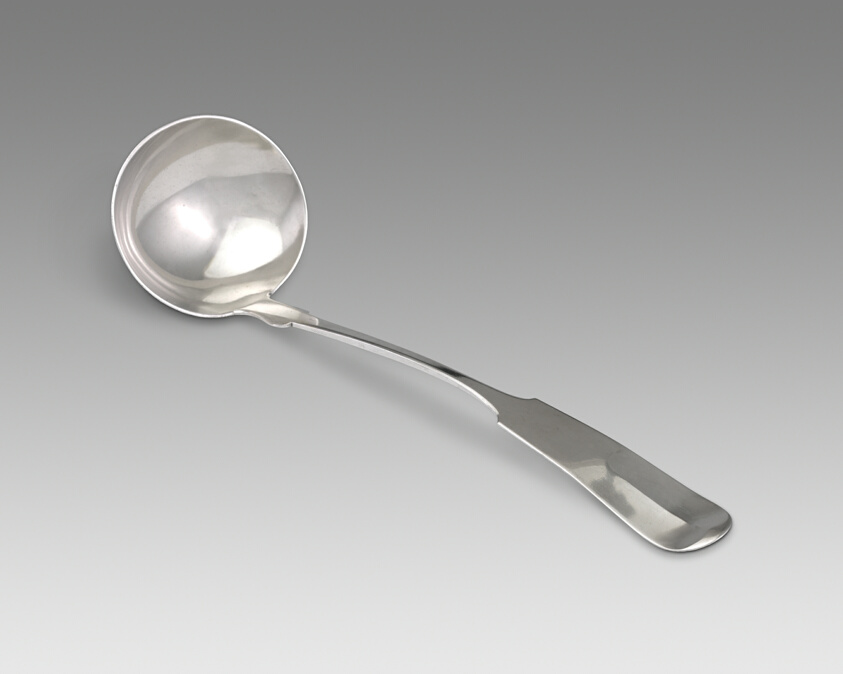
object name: Metalwork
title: Ladle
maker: James Easton; American, 1807–1903; Nantucket, Massachusetts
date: 1825–30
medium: Silver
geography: Nantucket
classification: ladle; silver; utensil for serving food; utensil; american decorative arts; american arts; decorative arts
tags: spoon